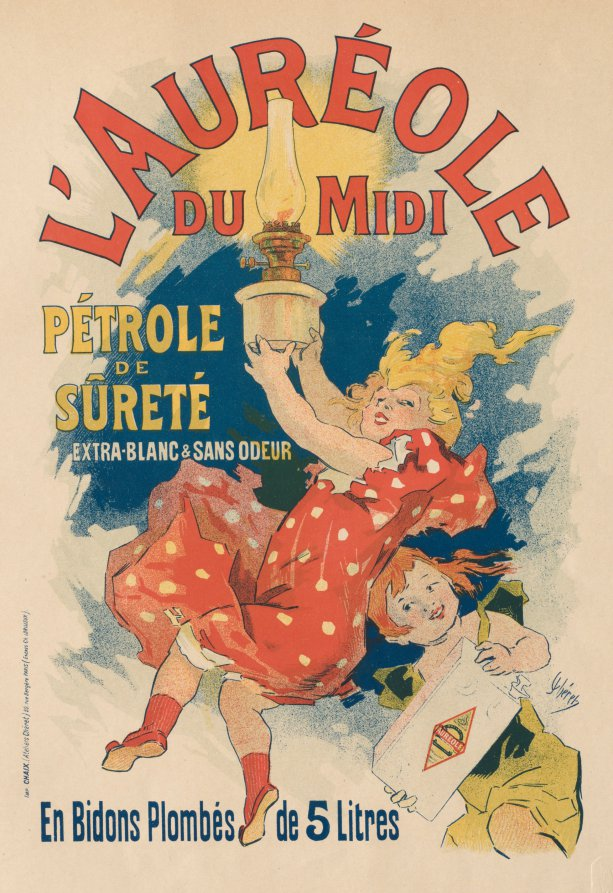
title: The Aura of Noon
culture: France, 19th century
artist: Jules Chéret (French, 1836–1932)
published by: Encres Lorilleux & Co.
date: 1893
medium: color lithograph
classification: Print